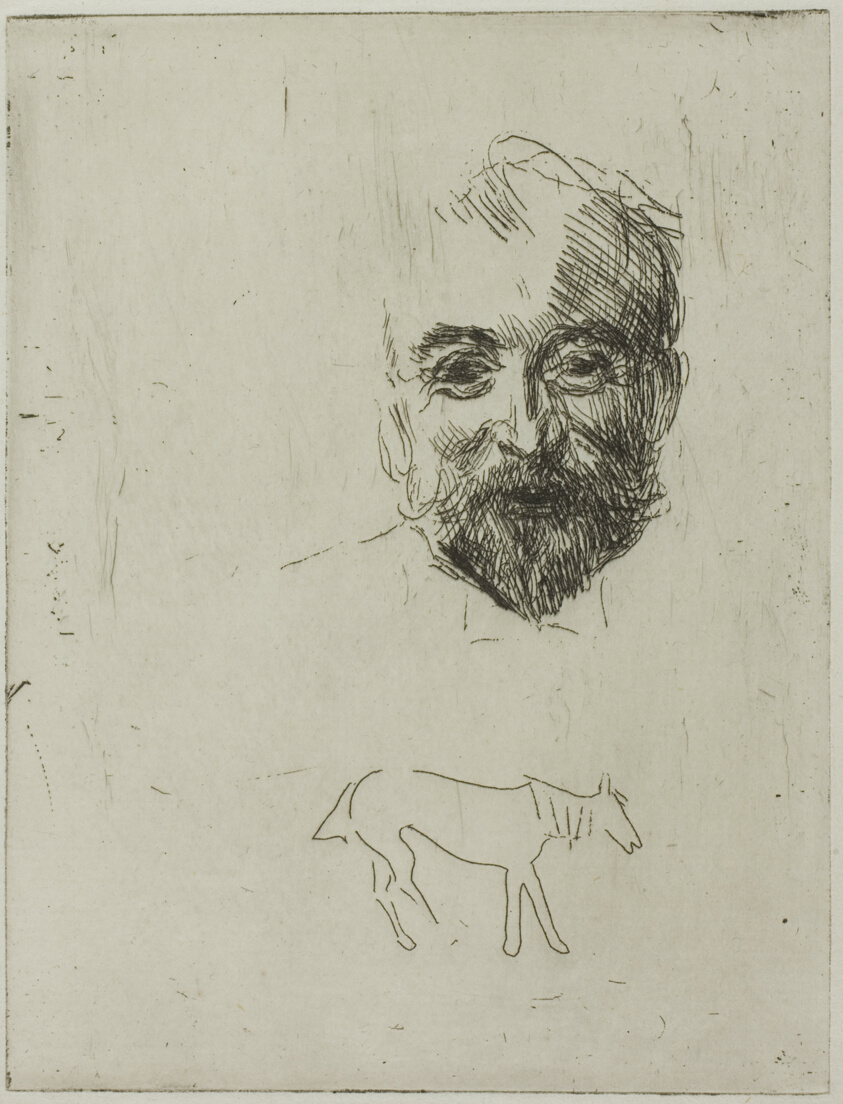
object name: Print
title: Georg Arsenius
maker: Anders Zorn (Swedish, 1860-1920)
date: 1898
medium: Etching on ivory laid paper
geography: Sweden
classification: etching; print; prints and drawing